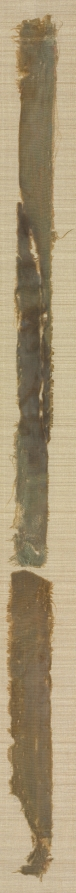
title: Vajrapani Embroidered Mount with Garuda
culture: China and Tibet, Embroidery: China, Yuan dynasty (1279-1368); painting: Tibet, 17th century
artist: Choying Dorje, the Tenth Black Hat Karmapa (Tibetan, 1604–1674)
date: painting 1600s, embroidery c. 1300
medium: Opaque watercolor, gold, and silver on silk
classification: Embroidery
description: The painting depicts the Buddhist protector who holds (pani) the thunder bolt (vajra) in his right hand. He kneels in reverence and holds his left hand in a gesture of salute. This unusual image appears to have been the vision of a Tibetan monastic patriarch known for creating his own inventive paintings and sculptures. Sewn to the painting are Chinese damask borders and rare embroideries dating to the Chinese Yuan dynasty (1279–1368). They depict man-eagle figures known as Garuda, a form occasionally assumed by Vajrapani.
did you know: Vajrapani sometimes takes the form of Garuda, enemy of snakes.